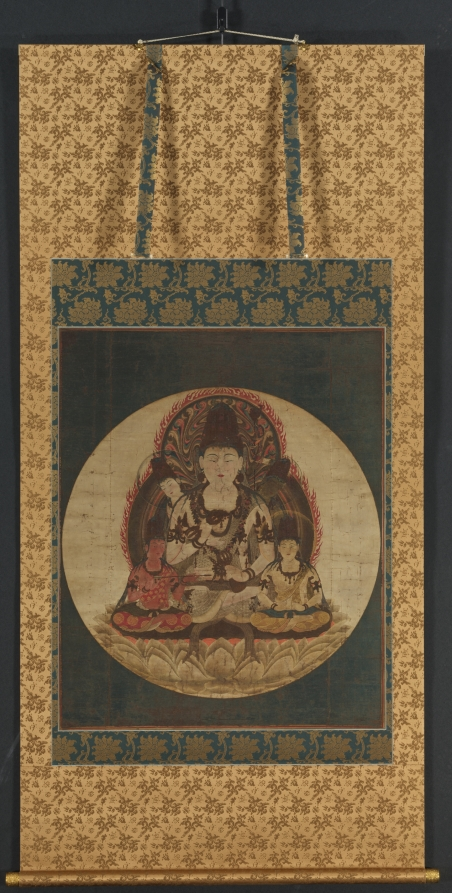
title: The Secret Five Bodhisattvas (Gohimitsu Bosatsu)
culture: Japan, Kamakura period (1185–1333)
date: 1200s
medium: hanging scroll; ink, color, gold, and silver on silk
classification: Painting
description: The Secret Five were used in a Buddhist ritual to convert negative aspects of consciousness into positive ones. At the center is Kongōsatta, who represents the enlightened mind. He is surrounded by enlightened beings who convert the human frailties of desire, sensory pleasure, passion, and pride into constructive tools to use on the path to enlightenment.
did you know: The bodhisattva Kongōsatta wears a crown containing figures of the Five Wisdom Buddhas.